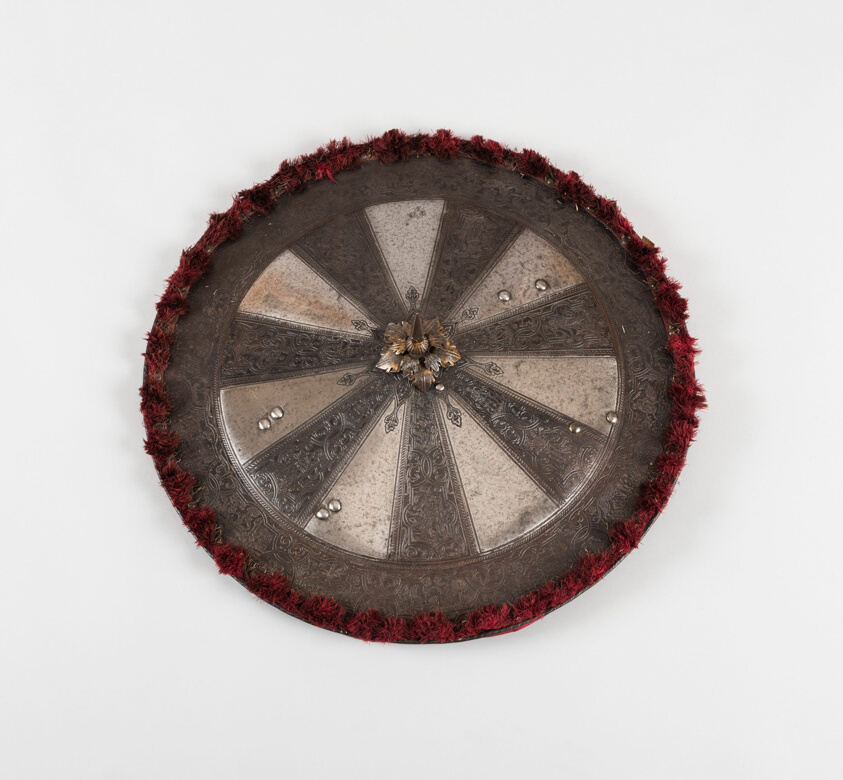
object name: Armor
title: Shield (Rondache) with a Spiked Umbo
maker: German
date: 1570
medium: Steel, iron, fabric, and leather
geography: Germany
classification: shield; armor; arms and armor